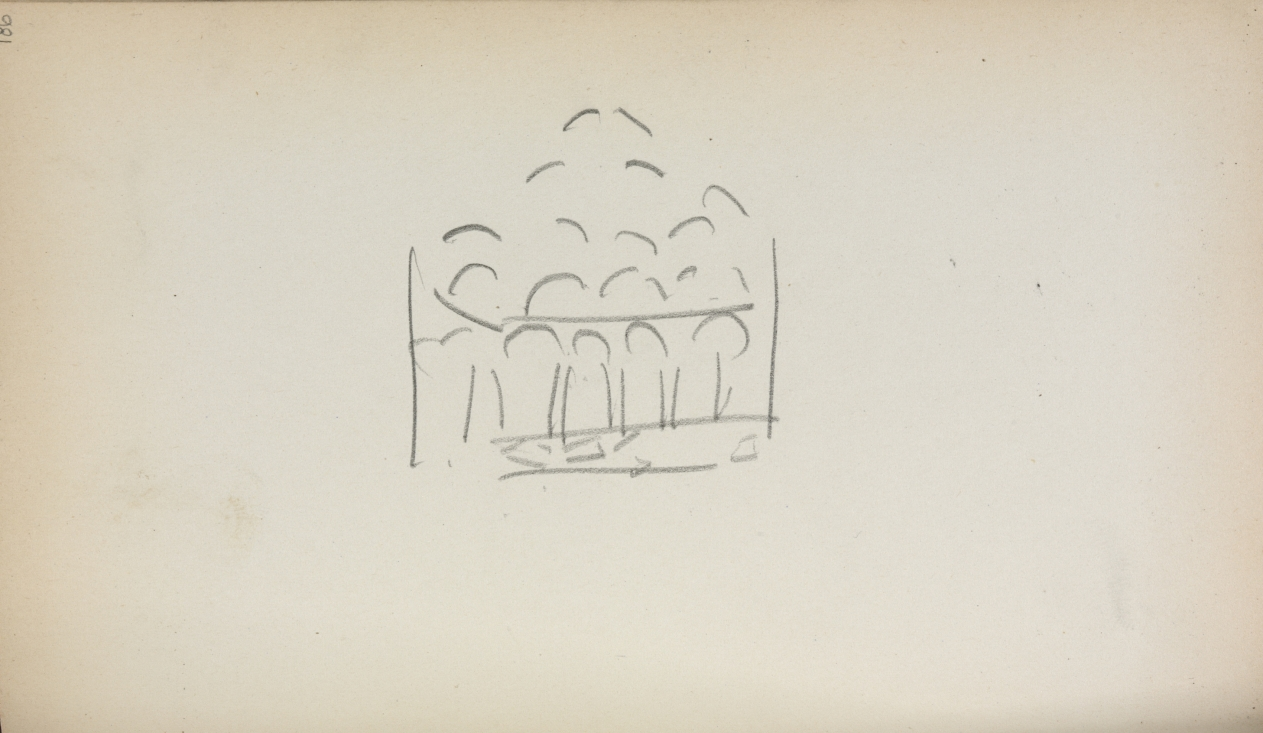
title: Italian Sketchbook: San Marco (page 186)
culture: America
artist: Maurice Prendergast (American, born Newfoundland [now Canada], 1858–1924)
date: 1898–1899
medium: pencil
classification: Bound Volume